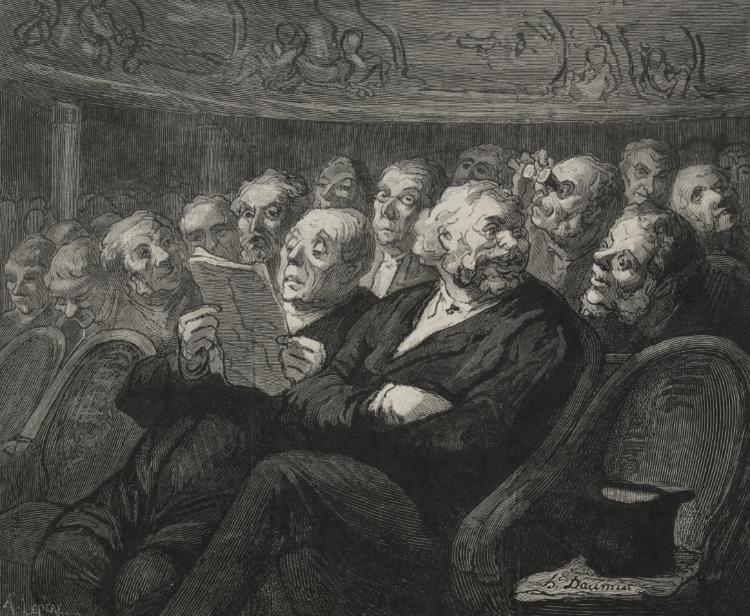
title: The Orchestra Seats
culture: France, 19th century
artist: after Honoré Daumier (French, 1808–1879)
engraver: Auguste Louis Lepère (French, 1849–1918)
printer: François Louis Schmied (Swiss, 1873–1941)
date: 1878, printed 1920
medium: wood engraving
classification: Print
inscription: Lower margin, in pencil: 65/75 ; red stamp: FLS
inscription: In plate, lower left corner: A. LEPÈRE ; Lower right side: h. Daumier